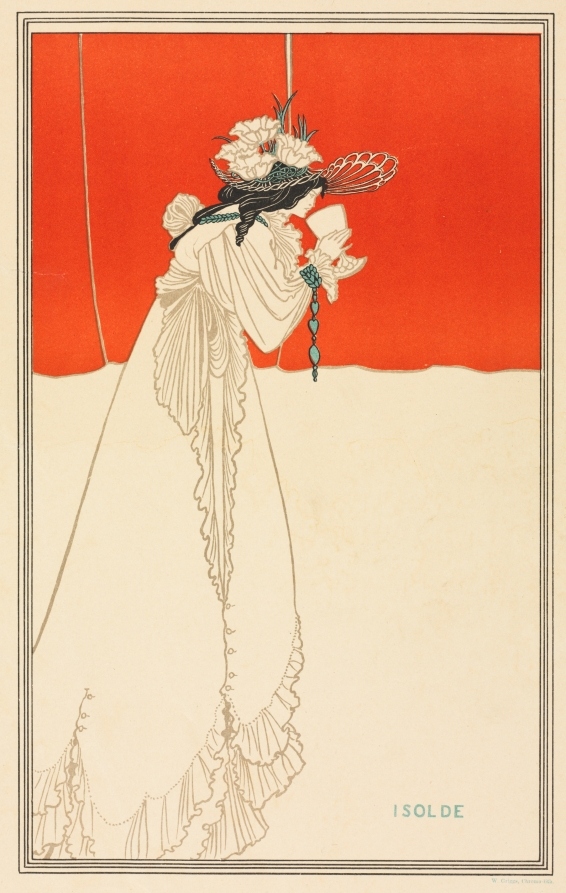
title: Isolde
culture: England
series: The Studio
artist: Aubrey Beardsley (British, 1872–1898)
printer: William Griggs (British, 1832–1911)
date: 1895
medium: color lithograph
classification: Print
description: This print depicts Isolde, the female protagonist of a medieval romance centered on an adulterous love triangle. Aubrey Beardsley frequently drew from literature in his artwork, whether as illustrations or independent works of art. He became immensely popular during the 1890s, when this work was made, for his characteristically stark, sinuous, and linear style. Although Beardsley's images often accompanied text in books, this print was published by the popular British art journal The Studio as a bonus for its readers.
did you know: Aubrey Beardsley died unexpectedly at the age of just 25, at the height of his popularity, of tuberculosis.